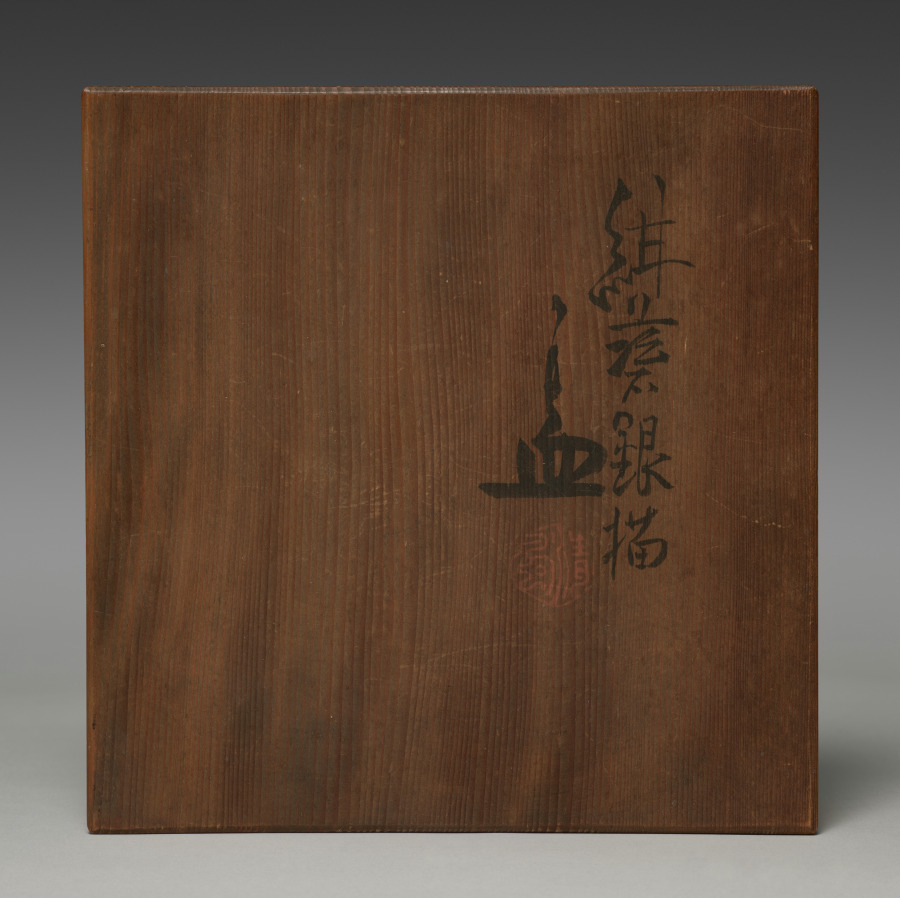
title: Bowl with Numinous Fungi and Kirin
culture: Japan, Meiji period (1868–1912)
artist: Seifū Yohei III (Japanese, 1851–1914)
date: 1893–1900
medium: Porcelain with cobalt blue glaze, overglaze color enamel, and silver painting overlay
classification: Ceramic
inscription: 清風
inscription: 清風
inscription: 帝室技芸員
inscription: 清風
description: The complex design of this bowl is also technically sophisticated in its execution. On the interior, Yohei III has placed a mythical beast called a kirin (Chinese, qilin) within a double-banded circle painted in cobalt blue under the glaze. Around the interior of the mouth, bordered at top and bottom with underglaze blue under a brown iron oxide painted rim, he has painted a continuous coin pattern with a red wash and green color enamels. The pattern is further defined and embellished with black iron outlining the green- and gold-painted diamonds over the diluted red. The inside is otherwise left white. On the exterior, the body has a dark blue glaze and an overlaid silver design of reishi with incised lines for detail.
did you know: Inside the bowl is an auspicious, mythical deerlike creature called kirin in Japanese (麒麟 or qilin in Chinese).